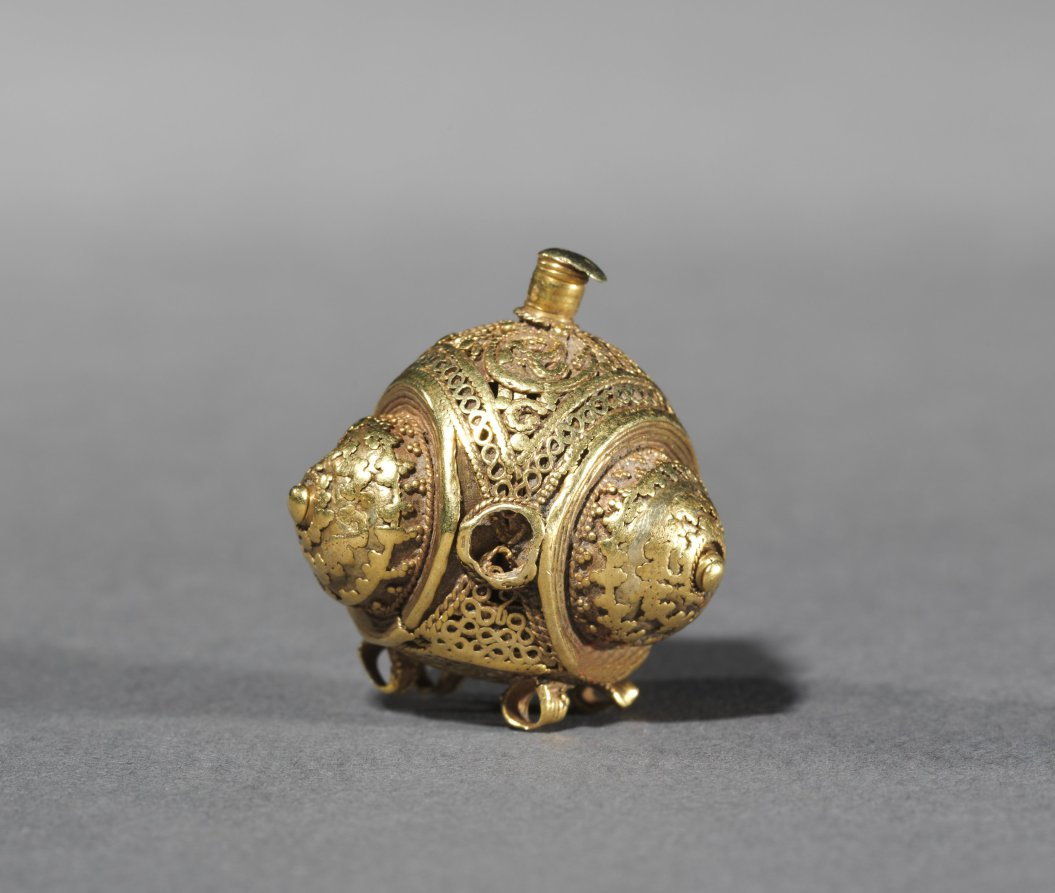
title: Button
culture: Iran, 10th–11th century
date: 900s–1000s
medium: gold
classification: Jewelry